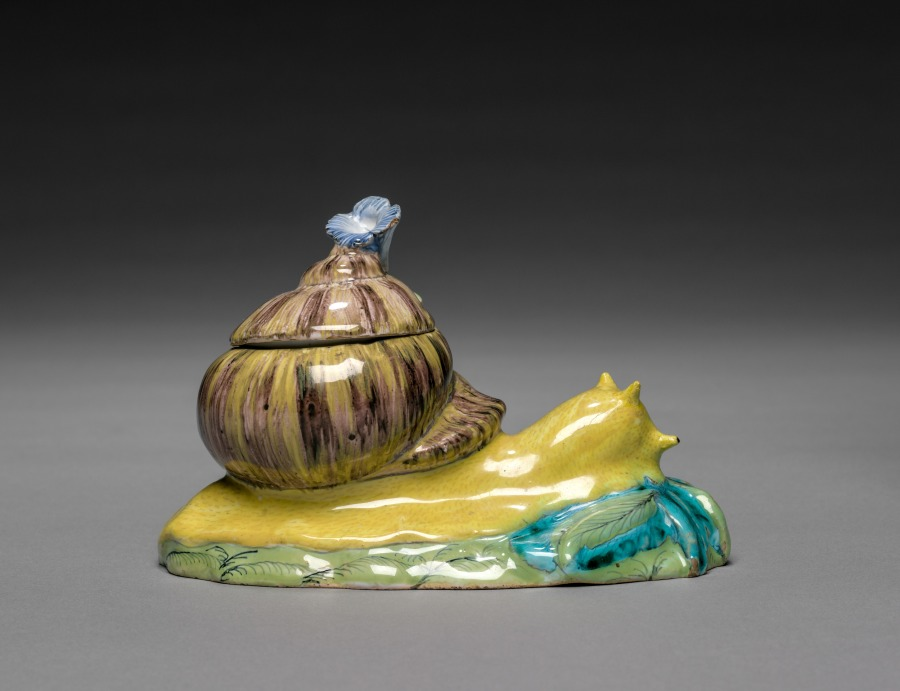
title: Covered Box in the Form of a Snail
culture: France, 18th century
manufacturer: Strasbourg Factory (France)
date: c. 1750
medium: faience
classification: Ceramic